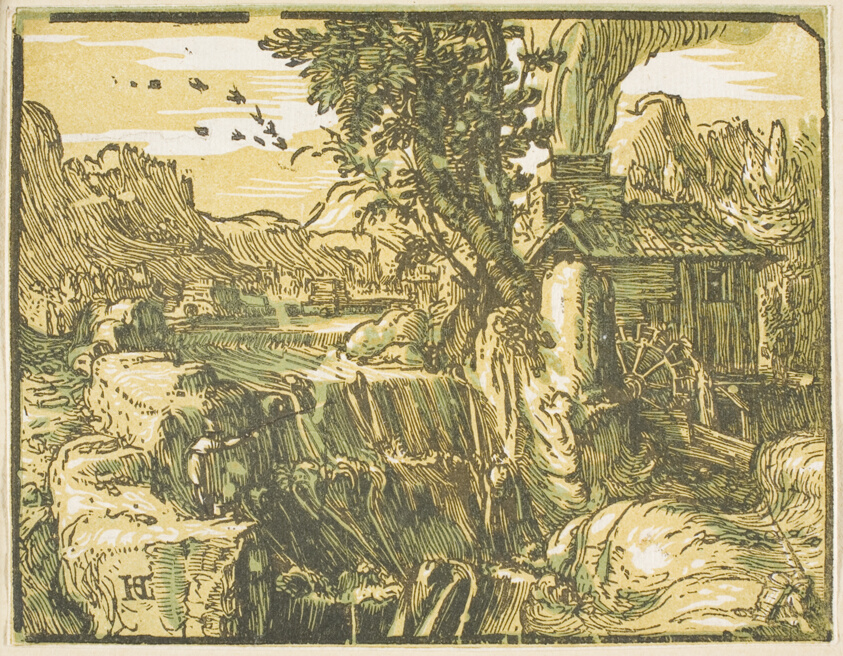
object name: Print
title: Landscape with a Waterfall, from Four Small Landscapes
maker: Hendrick Goltzius (Dutch, 1558-1617); printed by Willem Jansz. Blaeu, Amsterdam (Dutch, c. 1605-20)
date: 1597/1600, printed 1605/20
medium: Chiaroscuro woodcut in black, ochre, and green with additions of white gouache on blue ivory laid paper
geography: Netherlands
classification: woodcut; print; prints and drawing